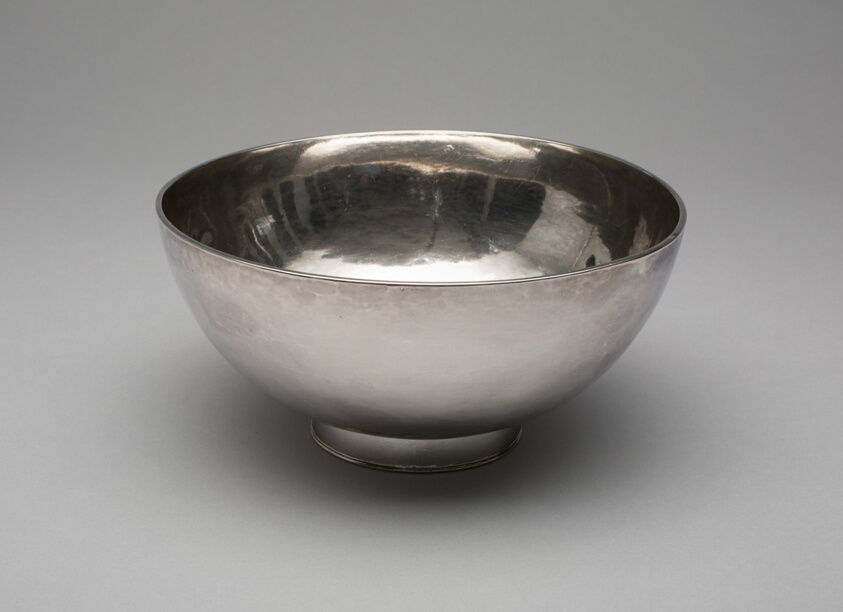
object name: Metalwork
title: Bowl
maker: Cornelius Wynkoop; American, c. 1701–1740; New York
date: 1725–40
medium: Silver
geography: New York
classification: bowl; silver; american decorative arts; american arts; decorative arts